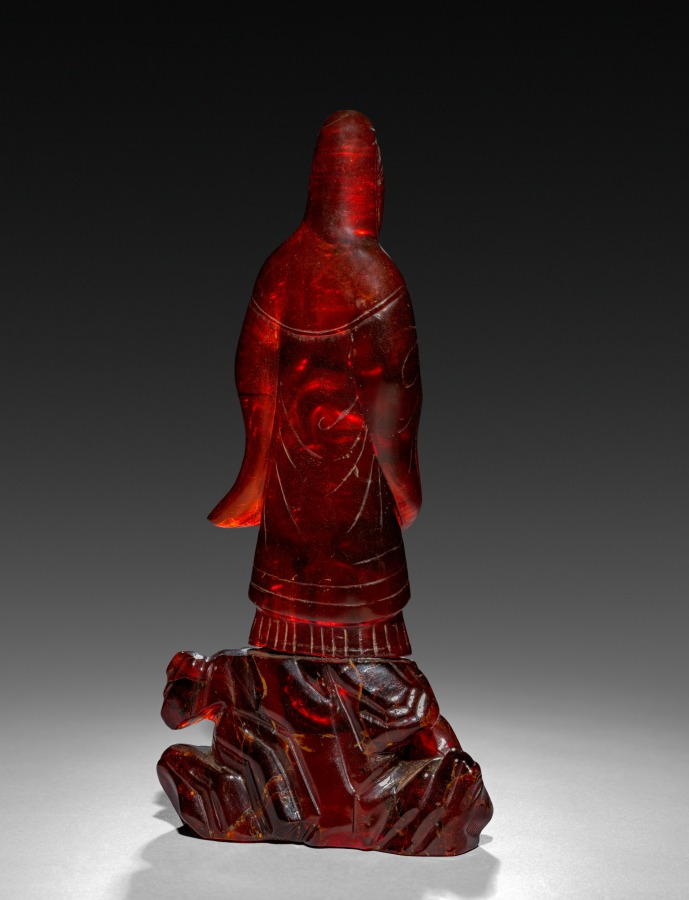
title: Guanyin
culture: China, Qing dynasty (1644-1911)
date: 18th Century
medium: amber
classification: Stone